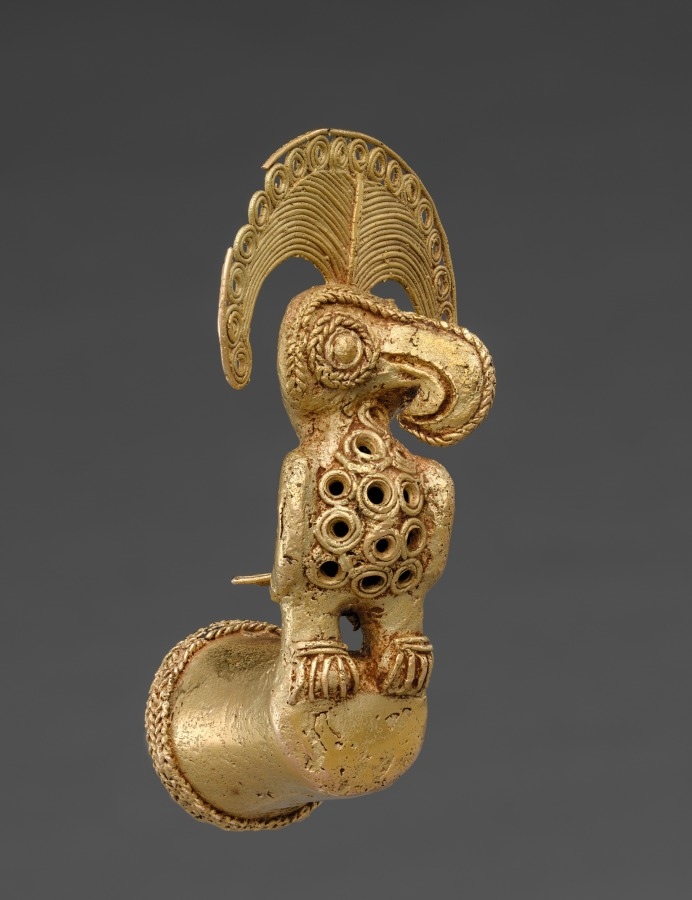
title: Finial with Bird (Harpy Eagle with Royal Flycatcher Crest?)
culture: Isthmian Region (Colombia), Sinú (Zenú), 5th century-11th century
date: 400–1000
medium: gold, cast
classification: Metalwork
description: This gold finial fit over the end of a staff, an emblem of rank. The bird has the hooked beak of a raptor—perhaps the harpy eagle, the “king” of tropical forests. The enormous crest, however, may be inspired by the Royal Flycatcher, a smaller bird that fans its unique, brilliantly colored crest during mating.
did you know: A museum visitor corrected our identification of this bird!